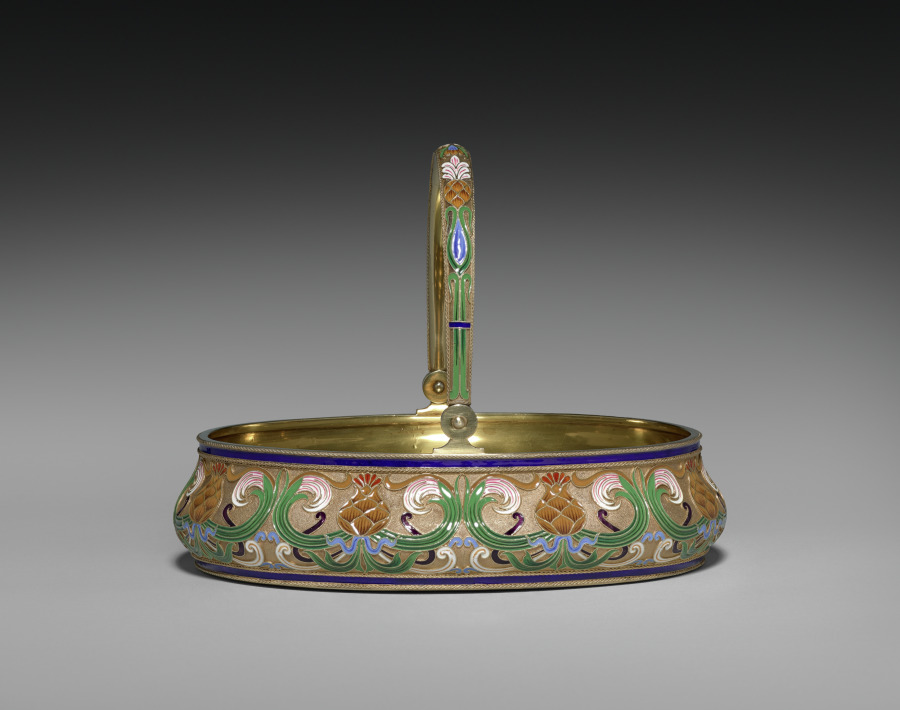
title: Cake Basket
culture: Russia, St. Petersburg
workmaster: attributed to Feodor Ivanovich Rückert (Russian, 1840–1917)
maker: House of Fabergé (Russian, 1842–1918)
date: 1887–96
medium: silver gilt, opaque cloisonné enamel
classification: Miscellaneous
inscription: 88, St. George [assay mark for Moscow, 1882-1896]; C. Fabergé (in Cyrillic); double-headed eagle [imperial warrant]; 10593 scratched.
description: Fabergé’s craftsmen in Moscow, especially under the watchful eye of workmaster Feodor Rückert, became known for their work in the Pan-Slavic or Neo-Russian style, hearkening back to 17th-century motifs of Russian folk art. Often on rather conventional shapes, Rückert and his silversmiths created an explosion of color, achieved through the historic technique of cloisonné enamel in which tiny metal lines are soldered to the surface then filled with glass powders in various colors and fired to create a high gloss finish. The result is a spectacular evocation of the 17th-century originals. Far from mere copies, however, Rückert's designs, such as this tea service, employ naturalistic or abstract motifs in a thoroughly modern adaptation of a remarkable earlier period of Russian art and decoration.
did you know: This cake basket is part of a larger tea service.